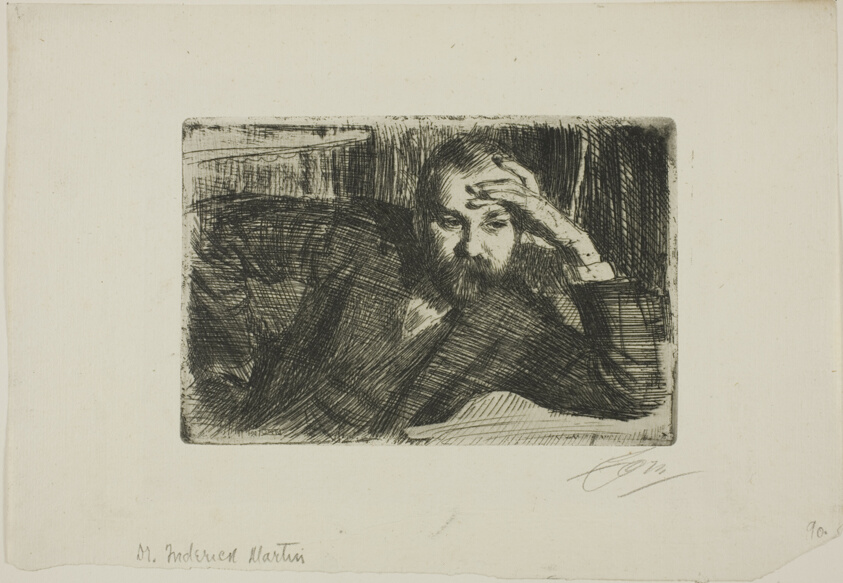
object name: Print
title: Fredrik Martin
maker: Anders Zorn (Swedish, 1860-1920)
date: 1907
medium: Etching on ivory laid paper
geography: Sweden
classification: etching; print; prints and drawing